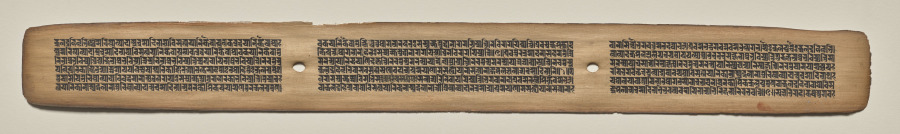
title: Text, Folio 154 (recto), from a Manuscript of the Perfection of Wisdom in Eight Thousand Lines (Ashtasahasrika Prajnaparamita-sutra)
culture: Eastern India, Bihar, Vikramashila Monastery. Painting: Nepal, Kathmandu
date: Sunday, September 14, 1119 (year 239 of the Newar Samvat in the month of Ashvina)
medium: gum tempera and ink on palm leaves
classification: Painting